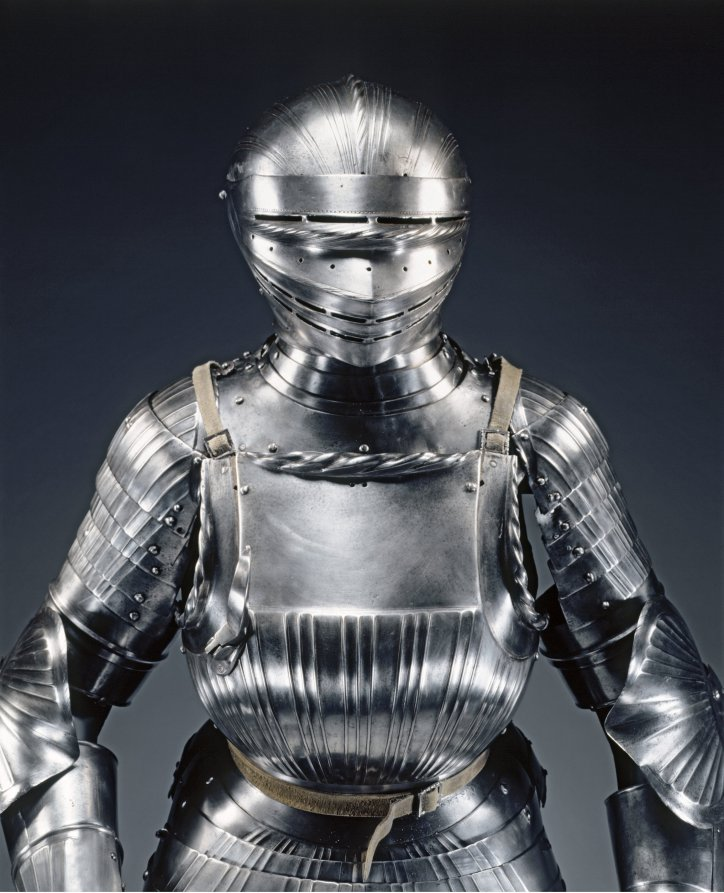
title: Field Armor in Maximilian Style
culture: Germany, Augsburg(?), early 16th century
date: c. 1510–15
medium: fluted steel with leather straps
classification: Arms and Armor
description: Most of the elements of this armor were made together, forming a single suit. The lower legs contain some modern restorations. The helmet is believed to be the work of the esteemed Augsburg armorer, Lorenz Helmschmied, who was active at the Habsburg, Mantua, and Urbino courts between 1467 and his death in 1515.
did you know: This armor was made to mimic the trend of pleated clothing that was popular at the time.